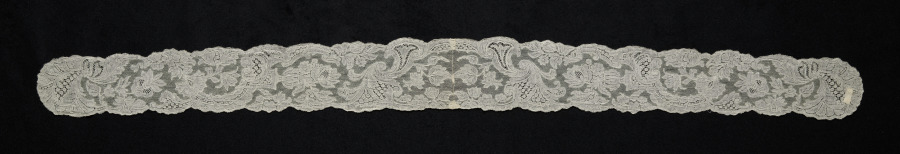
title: Lace Lappet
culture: Belgium, Mechelen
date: 1700s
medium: Linen: bobbin lace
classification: Lace